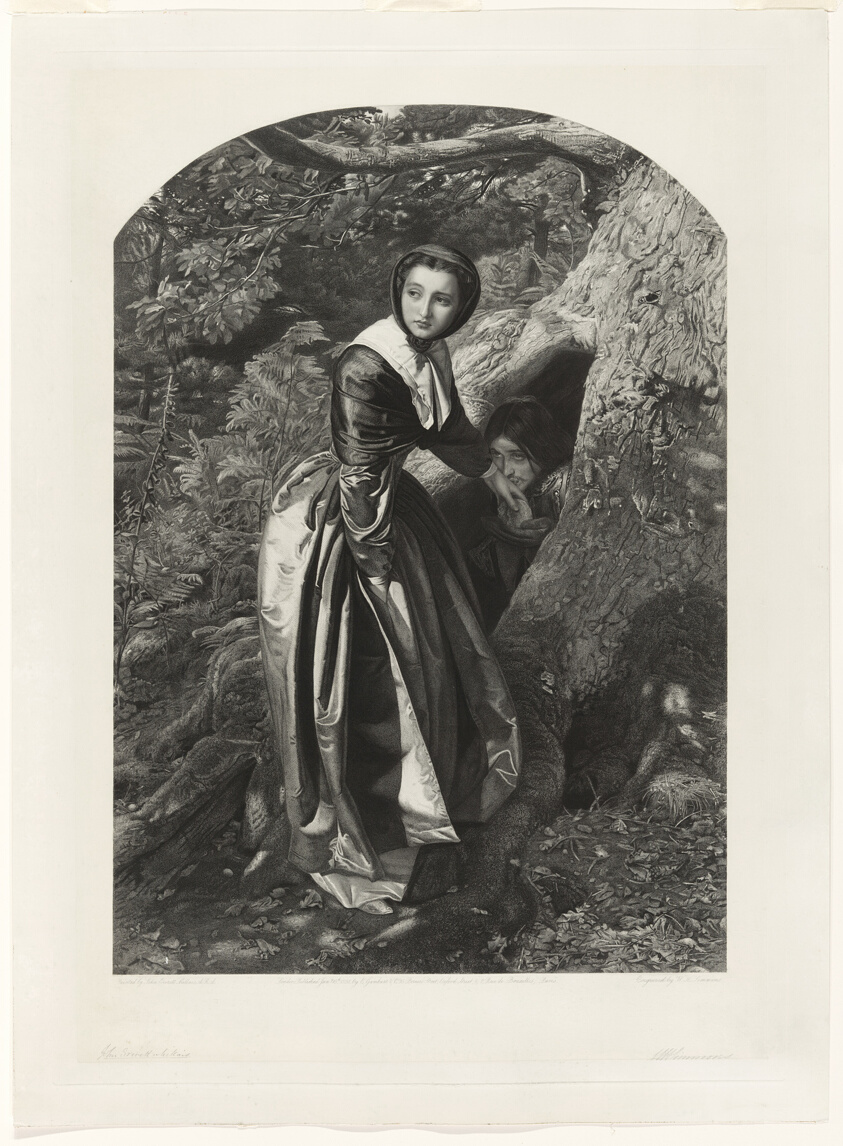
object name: Print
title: The Proscribed Royalist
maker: William Henry Simmons (English, 1811-1882); after Sir John Everett Millais (English, 1829-1896)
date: 1858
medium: Mixed method engraving on cream chine laid down on ivory wove paper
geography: England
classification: engraving; print; prints and drawing